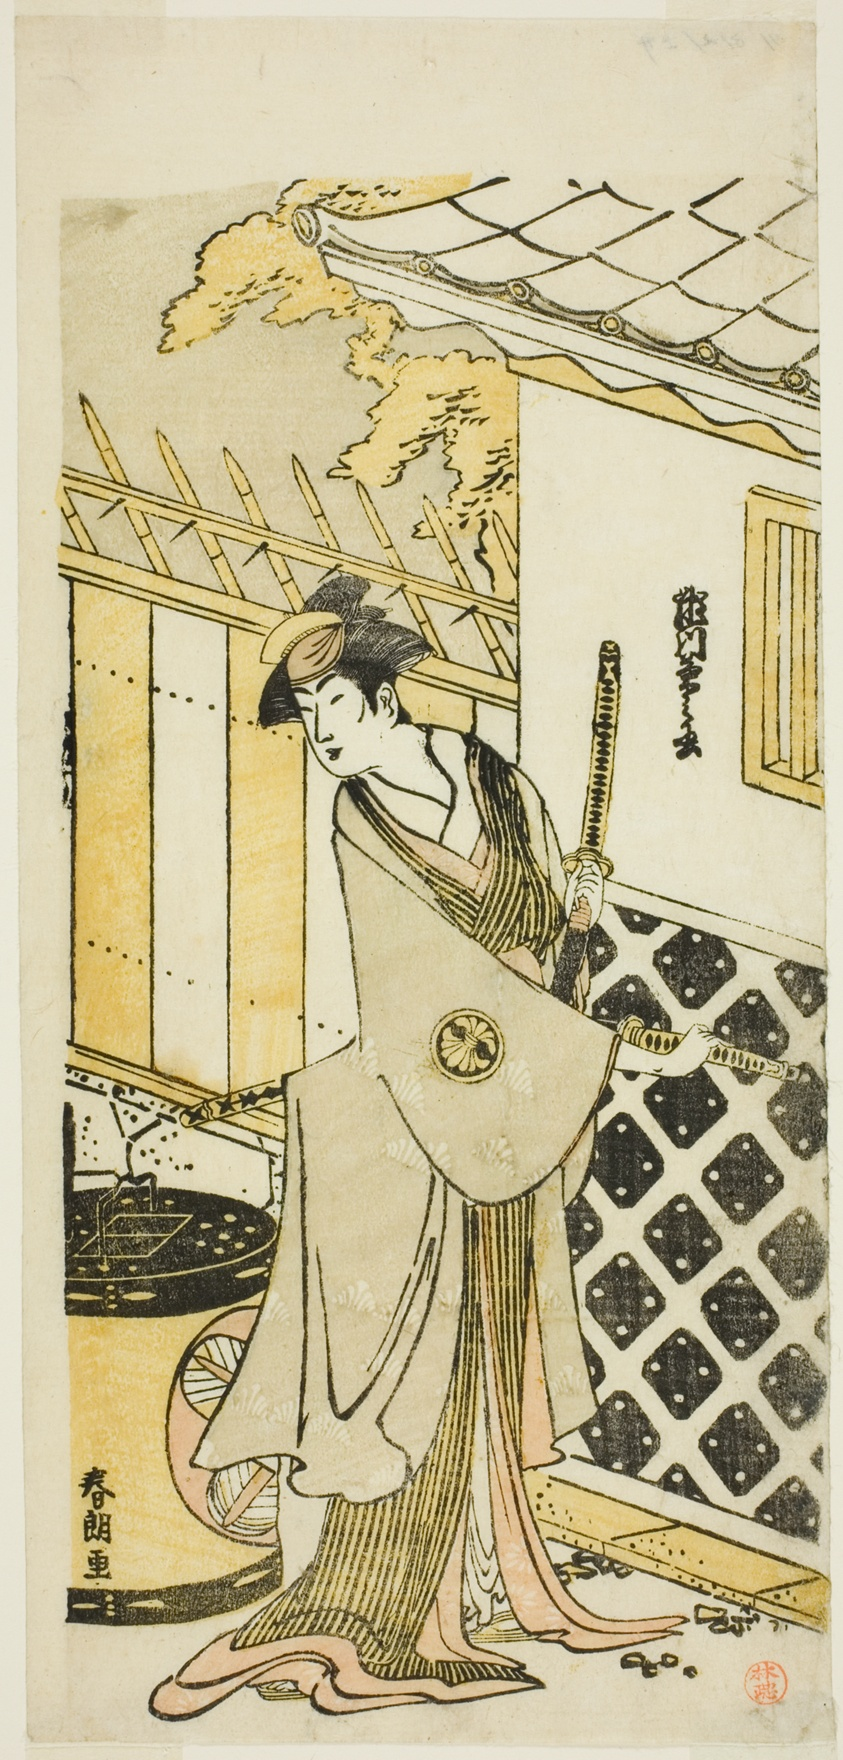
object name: Print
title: The Actor Segawa Kikunojo III as a Woman of a Samurai Family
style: Japanese (culture or style)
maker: Katsushika Hokusai 葛飾 北斎; Japanese, 1760-1849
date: c. 1786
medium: Color woodblock print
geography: Japan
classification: woodblock print; print; asian art